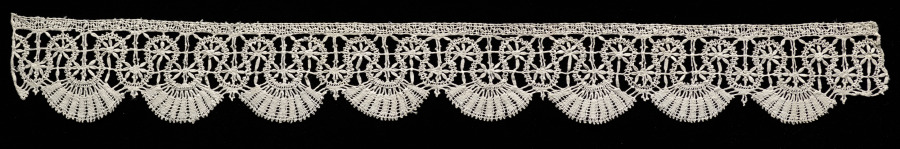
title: Lace Edging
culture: Italy, Genoa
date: 1600s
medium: Bobbin lace (needle lace, rose lace design)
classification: Lace